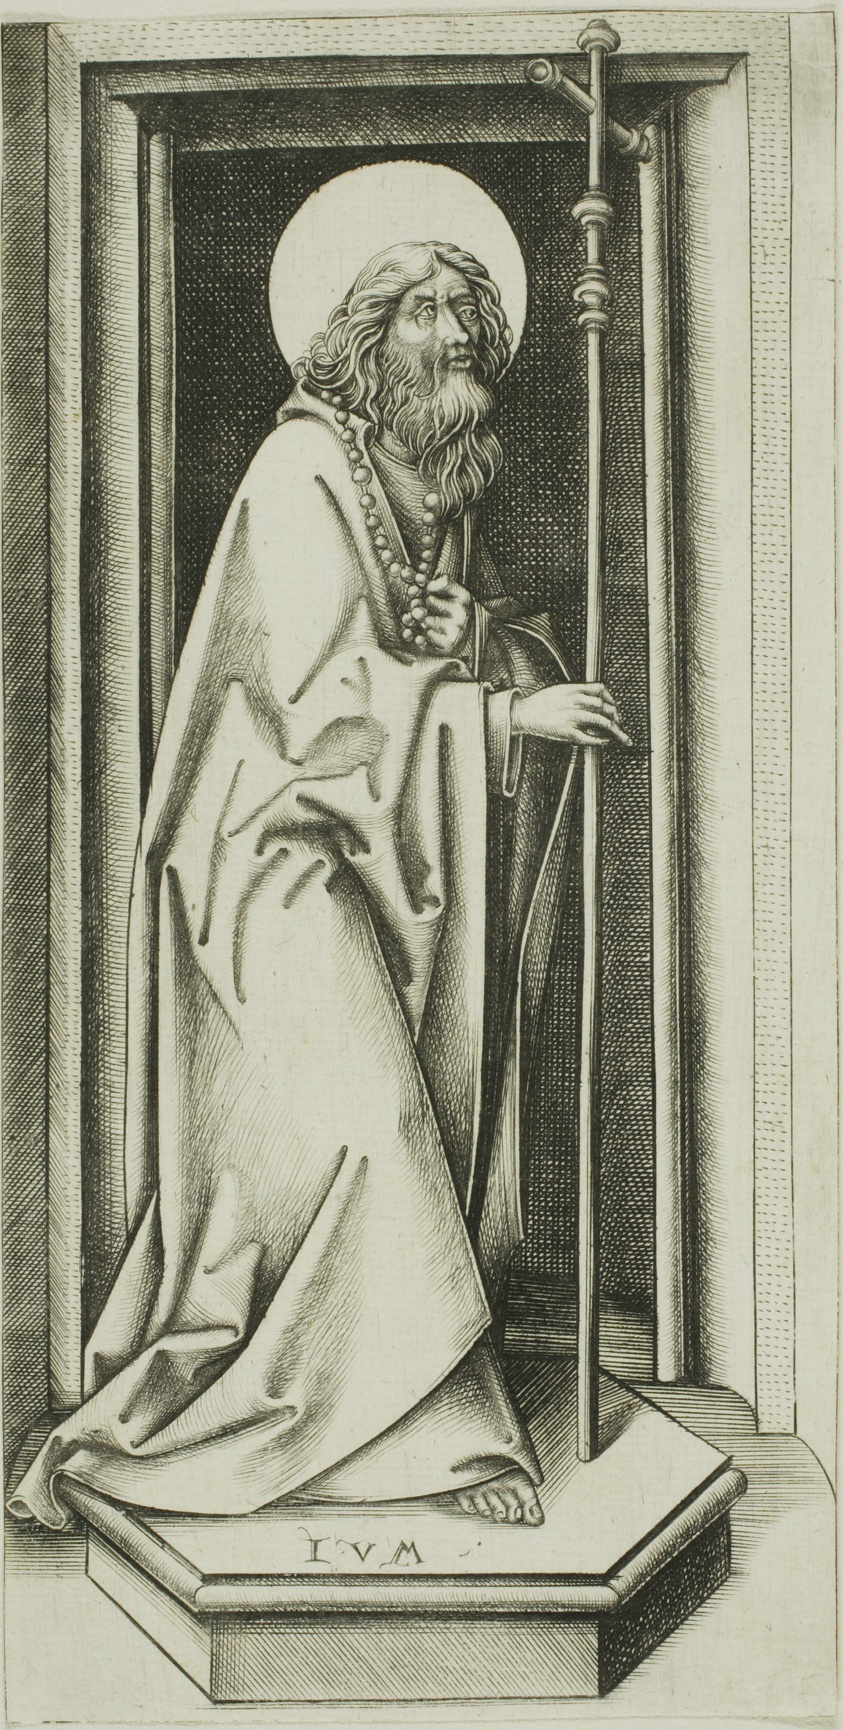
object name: Print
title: Saint Philip and Saint James the Lesser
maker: Israhel van Meckenem the Younger; German, c. 1440/45-1503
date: 1490/1503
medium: Two engravings on cream laid paper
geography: Germany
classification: engraving; print; prints and drawing